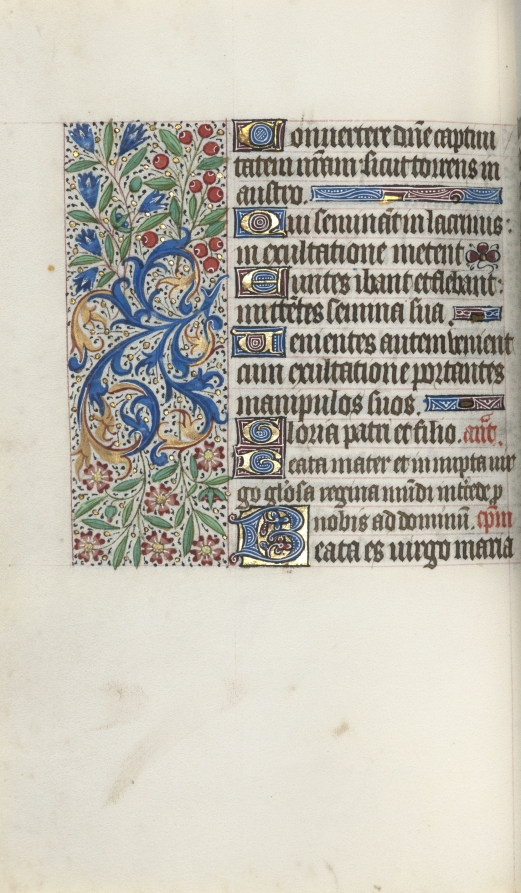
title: Book of Hours (Use of Rouen): fol. 72v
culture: France, Rouen, 15th century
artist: Master of the Geneva Latini (French, active Rouen, 1460–80)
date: c. 1470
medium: ink, tempera, and gold on vellum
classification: Bound Volume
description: In the late 1400s and early 1500s Rouen was an established and important center of book production. The city’s cathedral had a wealthy chapter that spent large sums of money to commission books and to maintain its extensive library. The stationers and booksellers would have likely been concentrated in or near the cathedral precinct. This artist, named after a manuscript now in Geneva, was Rouen’s principal illuminator during the second half of the 1400s.